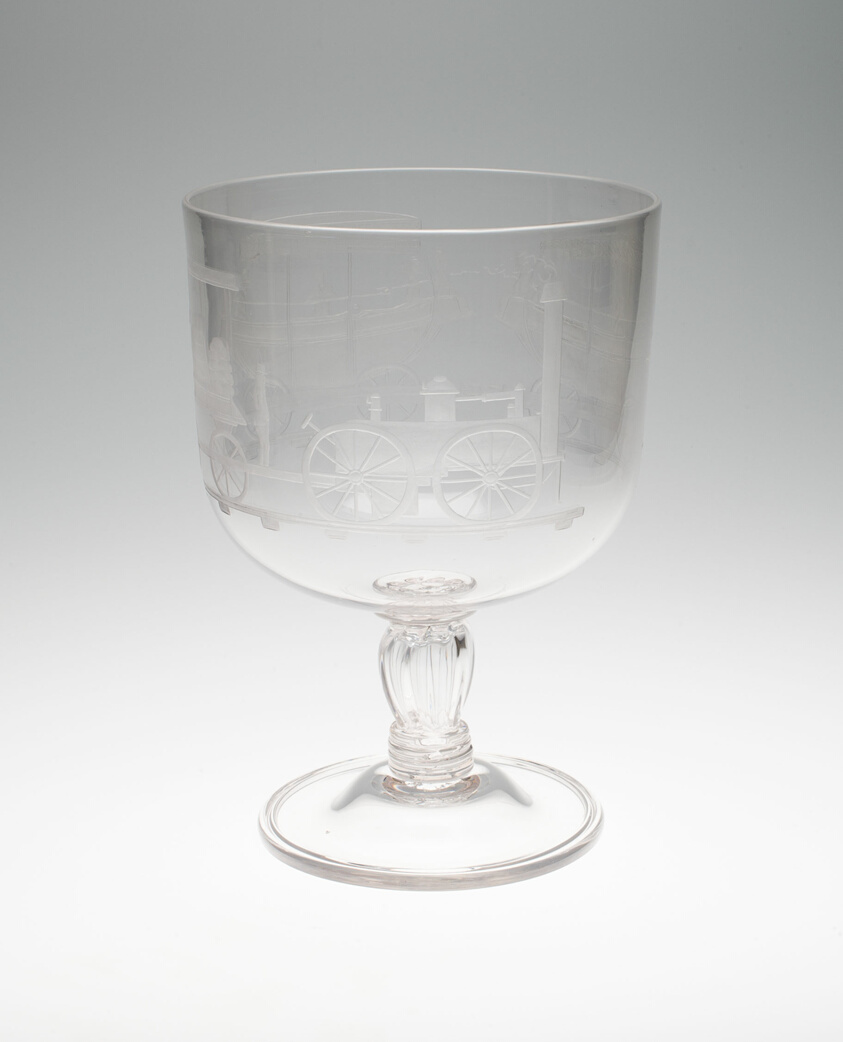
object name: Glass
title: Commemorative Goblet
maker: Czech, made for the American market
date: 1920/30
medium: Glass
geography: Czech Republic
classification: drinking vessel; glass; european decorative arts